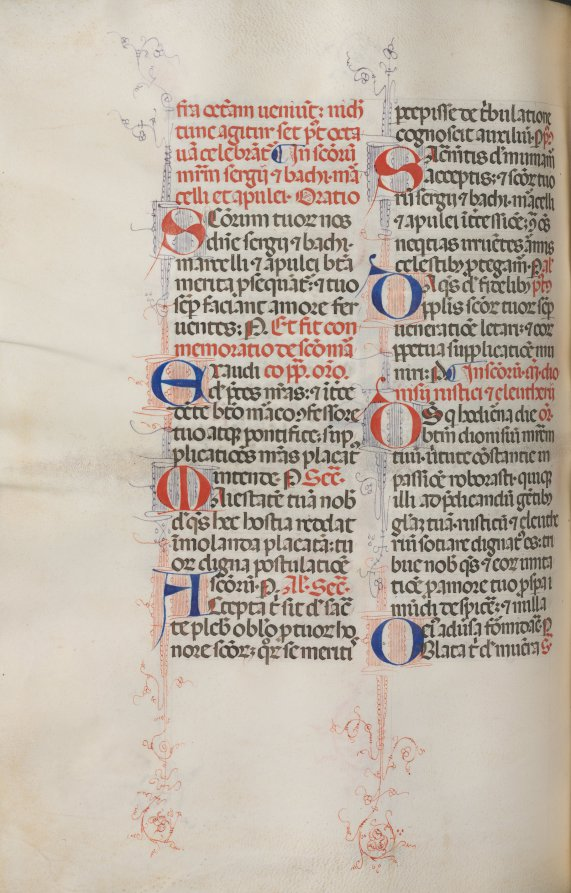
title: Missale: Fol. 319v: St. Francis & Full Mass of St. Francis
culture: Italy, Perugia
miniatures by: Bartolommeo Caporali (Italian, c. 1420–1503)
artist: assisted by Giapeco Caporali (Italian, d. 1478)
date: 1469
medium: ink, tempera and burnished gold on vellum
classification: Bound Volume